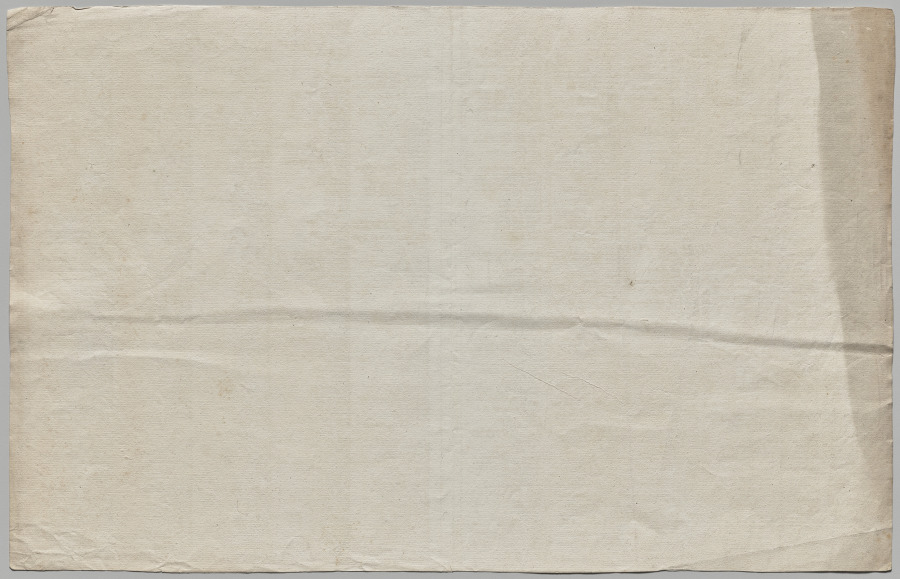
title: Nuova pianta di Roma data in luce da Giambattista Nolli l’anno MDCCXLVII, known as La Pianta Grande di Roma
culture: Italy, 18th century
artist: Giovanni Battista Nolli (Italian, 1701–1756)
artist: Carlo Nolli (Italian, 1690–1790)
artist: Rocco Pozzi (Italian, 1701–1774)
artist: Pietro Campana de Soriano (Italian, 1725–c. 1779)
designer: Stefano Pozzi (Italian, 1699–1768)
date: 1748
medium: etching and engraving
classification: Print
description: The monumental Pianta Grande di Roma, or Large Plan of Rome, which measures about 5 x 7 feet when its twelve plates are assembled, is a landmark in both cartography and printmaking. The map is considered the first scientific rendering of Rome, establishing new standards of accuracy and thoroughness when it was published in 1748. Devised by the Lombard architect and surveyor Giovanni Battista Nolli (Italian, 1701-56), the creation of the map required over ten years of surveying the city carried out by Nolli and a team of assistants with the help of new measuring devices. In Nolli’s “ichnographic” (also called “ground”) plan, architectural features and the urban infrastructure are reduced to a single horizontal slice, a minutely detailed footprint that conveys dimensions, proportions, and orientations to scale with the utmost clarity.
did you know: To make this map, Pope Clement XII granted the mapmaker permission to measure courtyards and other interior, inaccessible spaces in monastic communities, even those in nuns’ convents, which was controversial at the time.